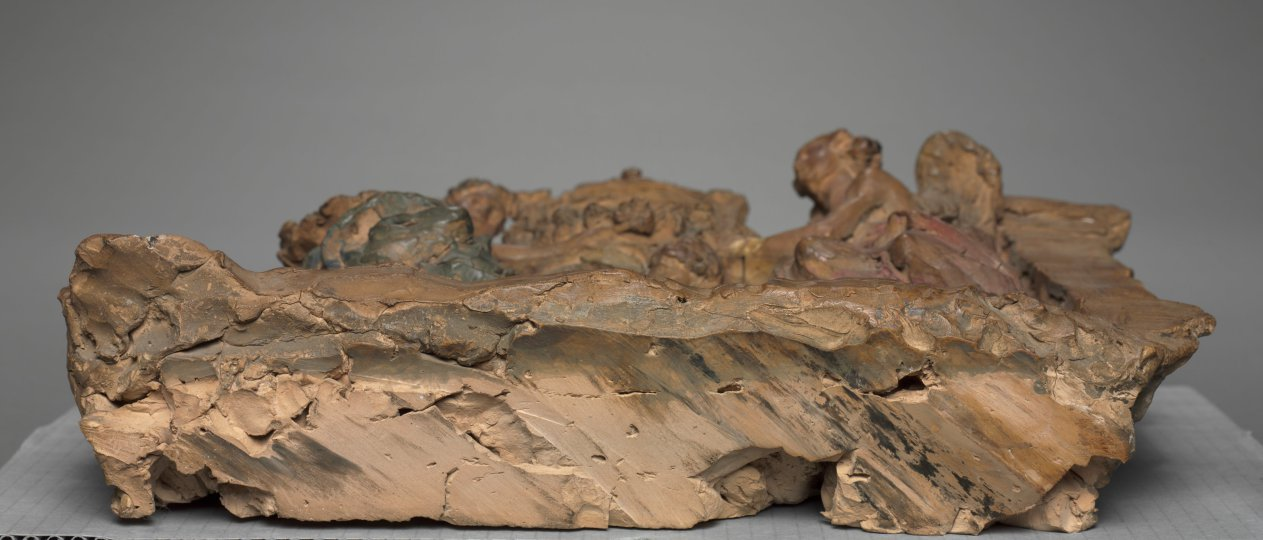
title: Two Angels and Cherubs Bearing an Icon of Christ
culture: Italy, Rome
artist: probably by Paolo Naldini (Italian, 1616–1691)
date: c. 1670–80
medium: terracotta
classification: Sculpture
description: This work is probably a study for a large altarpiece that would have combined several materials, including marble, stucco, and paint. The artist modeled his design in soft clay, which was then hardened by firing; subtle tints suggest the richness of the finished work. The idea of using sculptural figures to support a painted image within an altarpiece was influenced by the work of the Roman sculptor Gian Lorenzo Bernini (1598–1680), with whom Naldini is known to have worked.